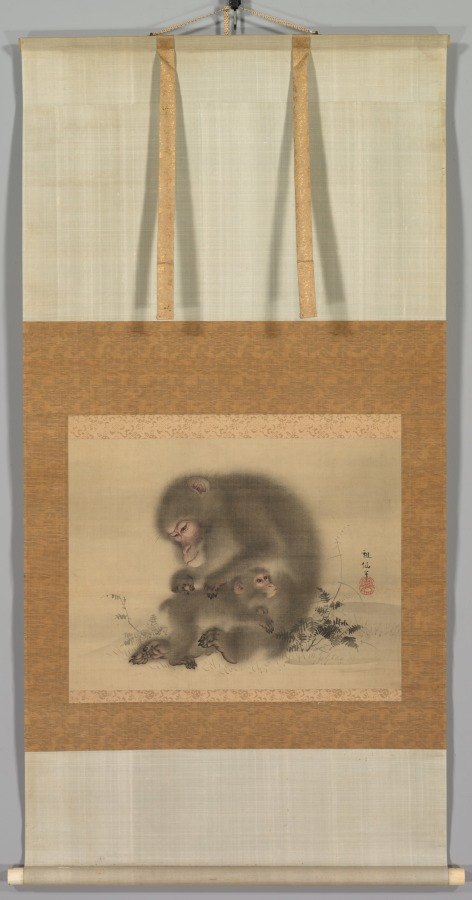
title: Monkeys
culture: Japan, Edo period (1615–1868)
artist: Mori Sosen (Japanese, 1747–1821)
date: early 1800s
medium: hanging scroll; ink and light color on silk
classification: Painting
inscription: Signature and seal